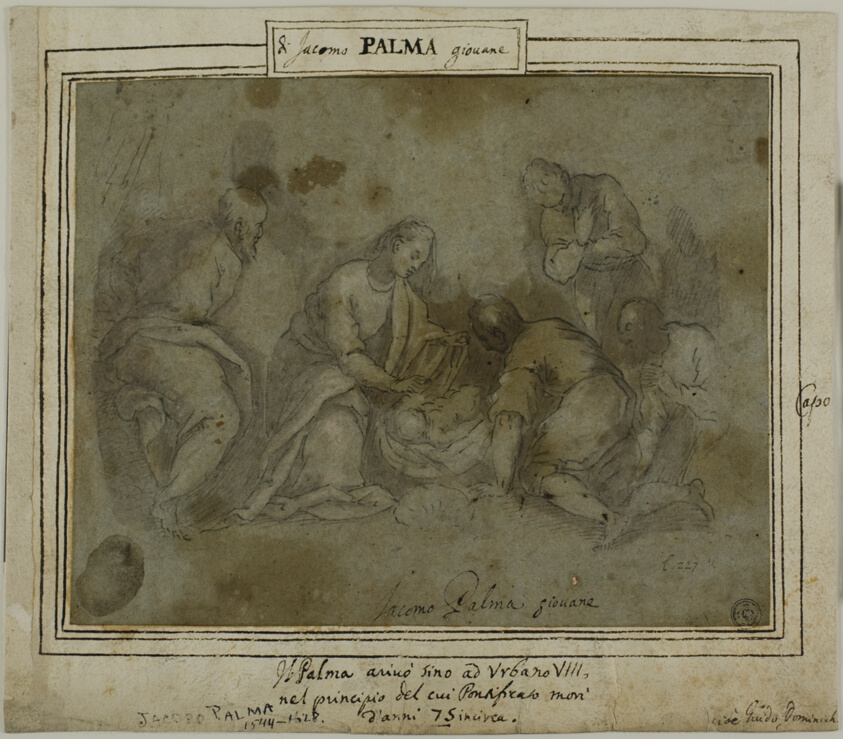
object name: Drawing and Watercolor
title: Adoration of the Shepherds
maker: Follower of Jacopo Negretti, called Palma il Giovane; Italian, c. 1548-1628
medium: Pen and black ink with brush and gray wash, heightened with white gouache, on blue laid paper, laid down on ivory laid paper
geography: Italy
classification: ink with wash; drawings (visual works); prints and drawing